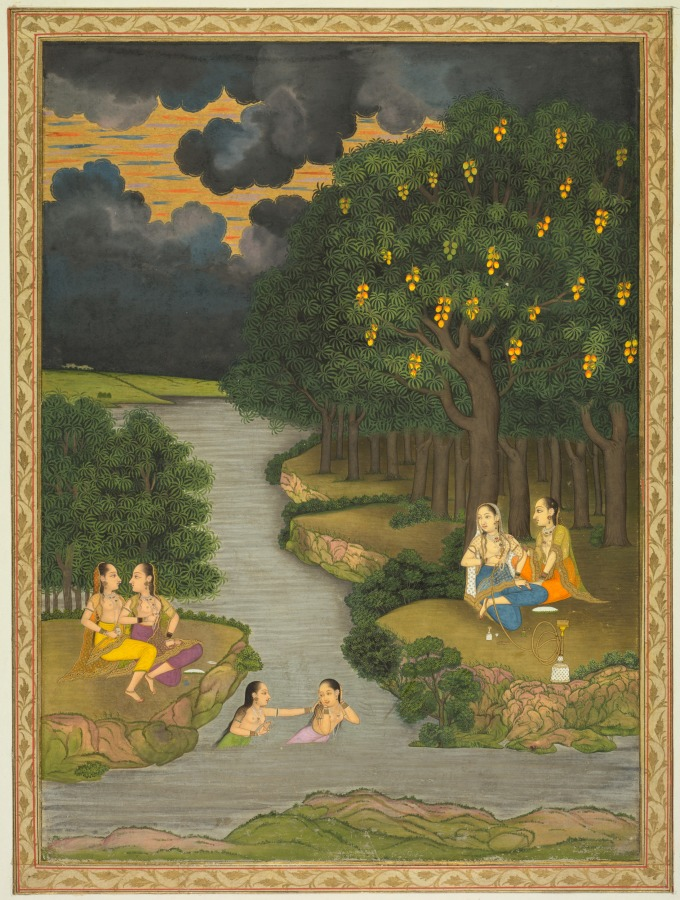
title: Women Enjoying the River at the Forest’s Edge (recto)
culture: India, Murshidabad or Lucknow, Mughal, 18th century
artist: style of Hunhar II (Indian, active mid-1700s)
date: c. 1765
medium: Gum tempera and gold on paper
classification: Painting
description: The image of young women at play, in association with water and the fruiting of trees, such as this mango, has been used in Indian art to signal the idea of prosperity and abundance. Rain clouds approach that will nourish the land. The pairs of women on the banks sample perfumes, and in front of them bowls made of leaves appear to hold jasmine flowers for adorning the hair. One woman smokes a hookah and looks on as two companions frolic in the rivulet. The palace’s white marble buildings are barely indicated in the far distance.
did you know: Mangoes are in varying stages of ripeness, from green to bright orange-yellow.